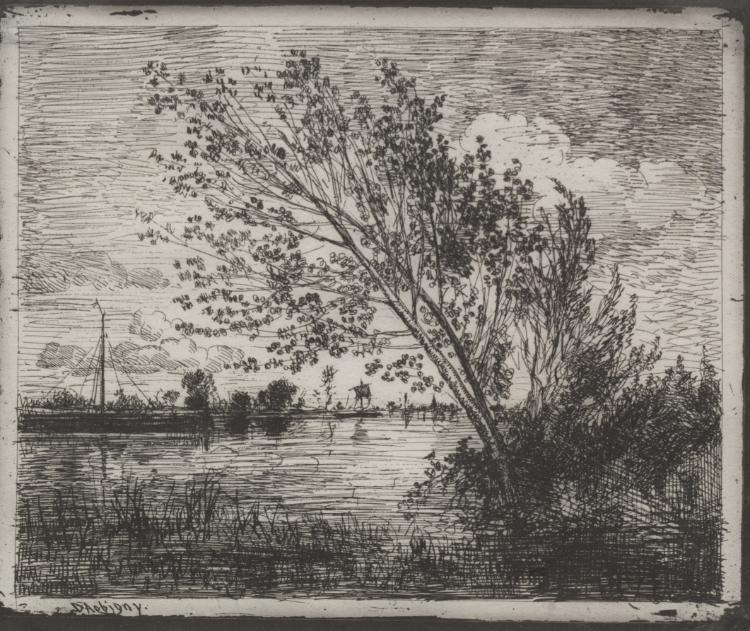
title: A Cluster of Alders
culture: France, 19th century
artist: Charles François Daubigny (French, 1817–1878)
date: original impression 1862, printed in 1921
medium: cliché-verre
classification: Print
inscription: signed, lower left, in glass plate: Daubigny